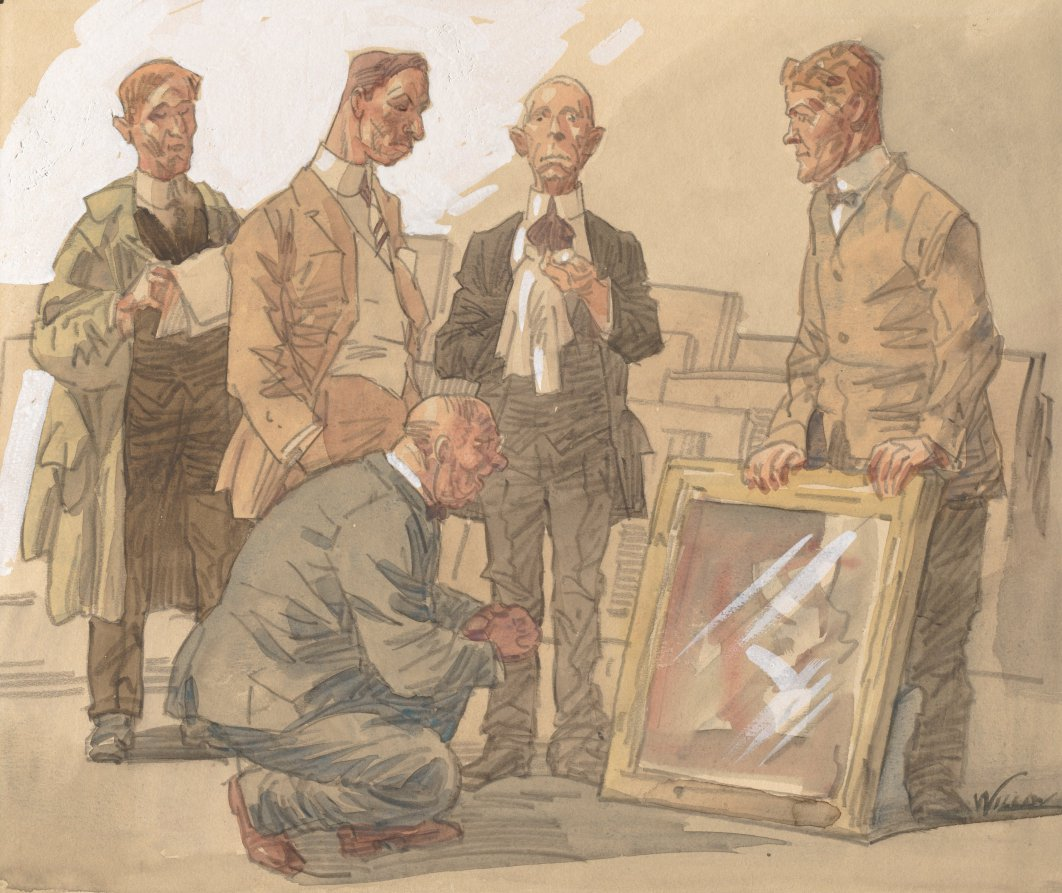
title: History of a Picture No. 1: Before the Jury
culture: America, Ohio, Cleveland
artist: Frank Wilcox (American, 1887–1964)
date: c. 1929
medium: pencil and wash heightened with white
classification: Drawing